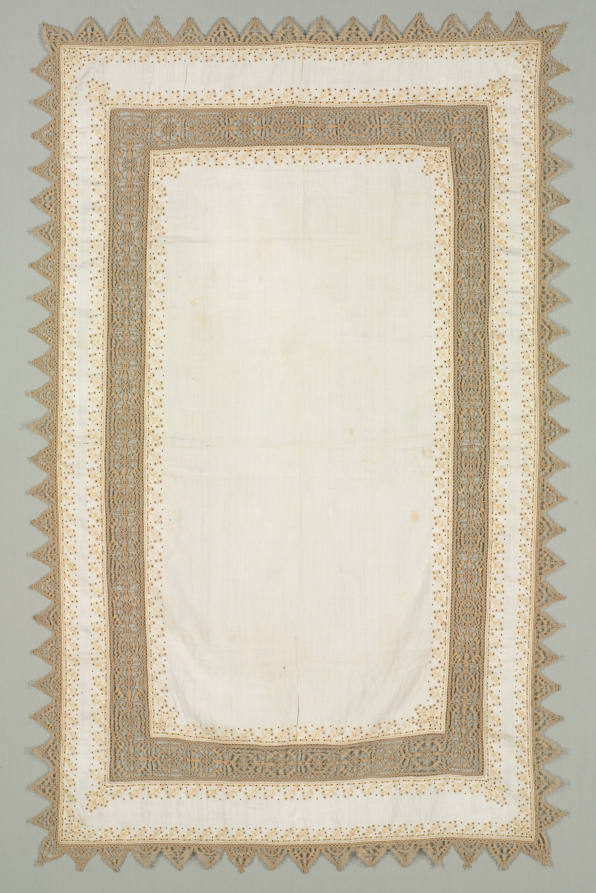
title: Cloth for a table ?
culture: Italy, Sicily, 1550-1599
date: 1550–1599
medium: Linen: bobbin lace (needle lace design)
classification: Lace